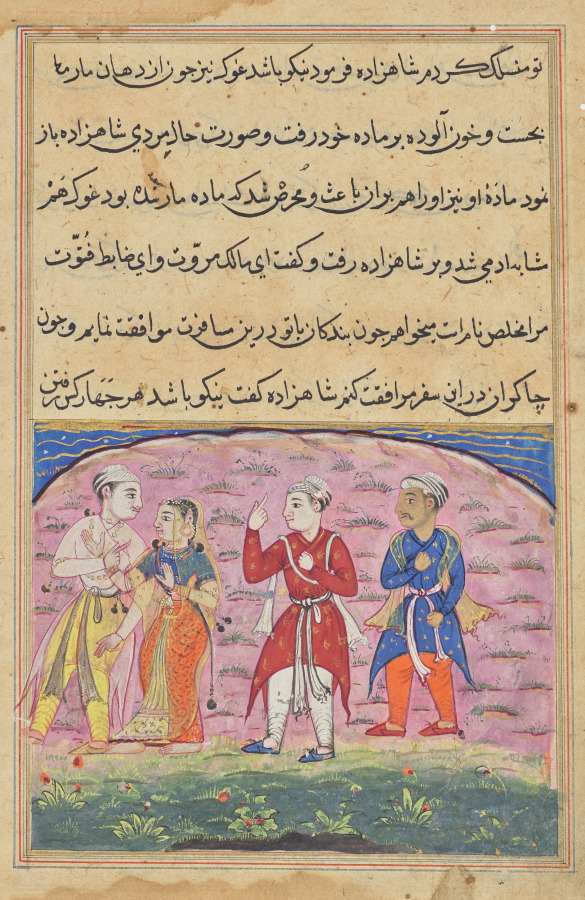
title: The prince and Nikfal are joined by Khalis and the Mukhlis who are the grateful snake and frog in human form, from a Tuti-nama (Tales of a Parrot): Eighteenth Night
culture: Mughal India, court of Akbar (reigned 1556–1605)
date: c. 1560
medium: gum tempera, ink, and gold on paper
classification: Painting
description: The prince, wearing yellow pants, with Nikfal (Good Fortune) by his side, looks back to see two men approaching. They introduce themselves as the cobra, whom the prince fed from his own flesh, and the frog, whose life he saved. They took on human forms and pledged to be his servants until they have returned the favor of his kindness. At the bottom of the page is the edge of a pool painted in silver paint that has tarnished black. Grass and poppies grow on its banks. The otherwise arid landscape has been painted pink with sparse grassy tufts.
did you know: The men wear Central Asian pants and tunic, while the woman wears Indian dress.